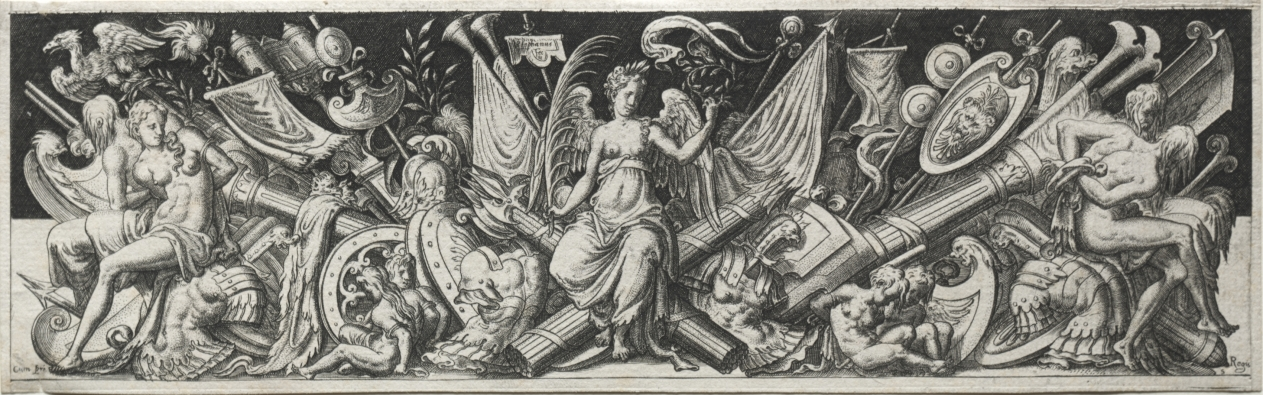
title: Combats and Triumphs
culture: France, 16th century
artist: Etienne Delaune (French, 1518/19-c. 1583)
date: probably 1560s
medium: engraving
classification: Print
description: Etienne Delaune (French, 1518/19-1583) Combats and Triumphs, probably 1560s Engravings Gift of Leonard C. Hanna 1924.671-.674 The Triumph of Bacchus Battle of Men and Animals Combat of the Naked Men Battle of the Centaurs and the Lapiths The four prints shown here come from a series of twelve known as the Combats and Triumphs. The friezelike composition reflects the artist's study of marble relief carvings on Greek and Roman sarcophagi (coffins), here reduced to a preciously small setting. Against a flat, stagelike background, Delaune's balletic warriors engage in a Mannerist version of artificial war. Etienne Delaune was inspired by the art created at Fontainebleau, but he worked in Paris and then Strasbourg during the late 1500s. His small, exquisitely executed engravings reflect his training as a goldsmith and his work as a medallist.